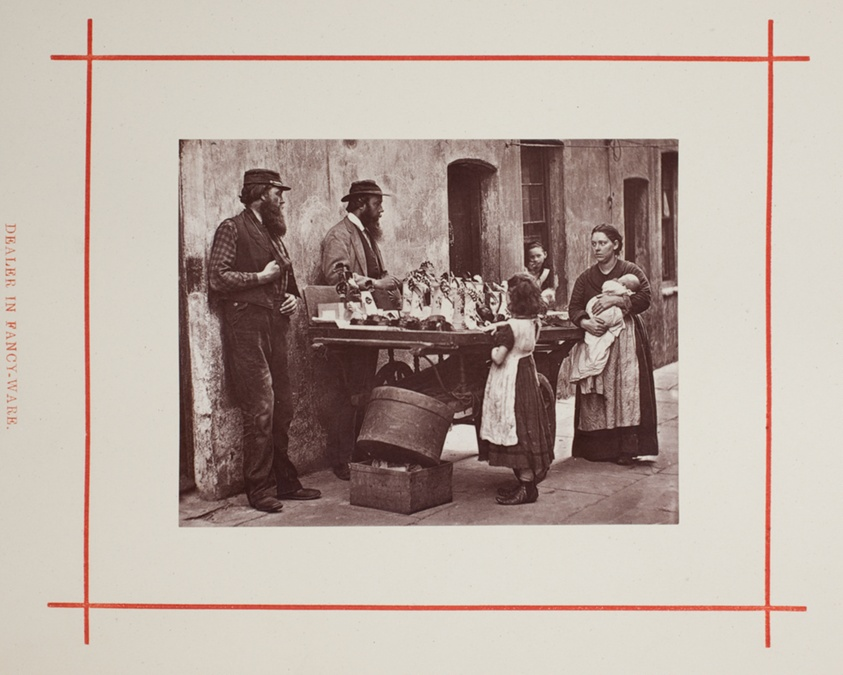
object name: Photograph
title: Dealer in Fancy-Ware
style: 19th century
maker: John Thomson (Scottish, 1837–1921)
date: 1877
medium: Woodburytype, from the album "Street Life in London"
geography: Scotland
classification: photograph; photography